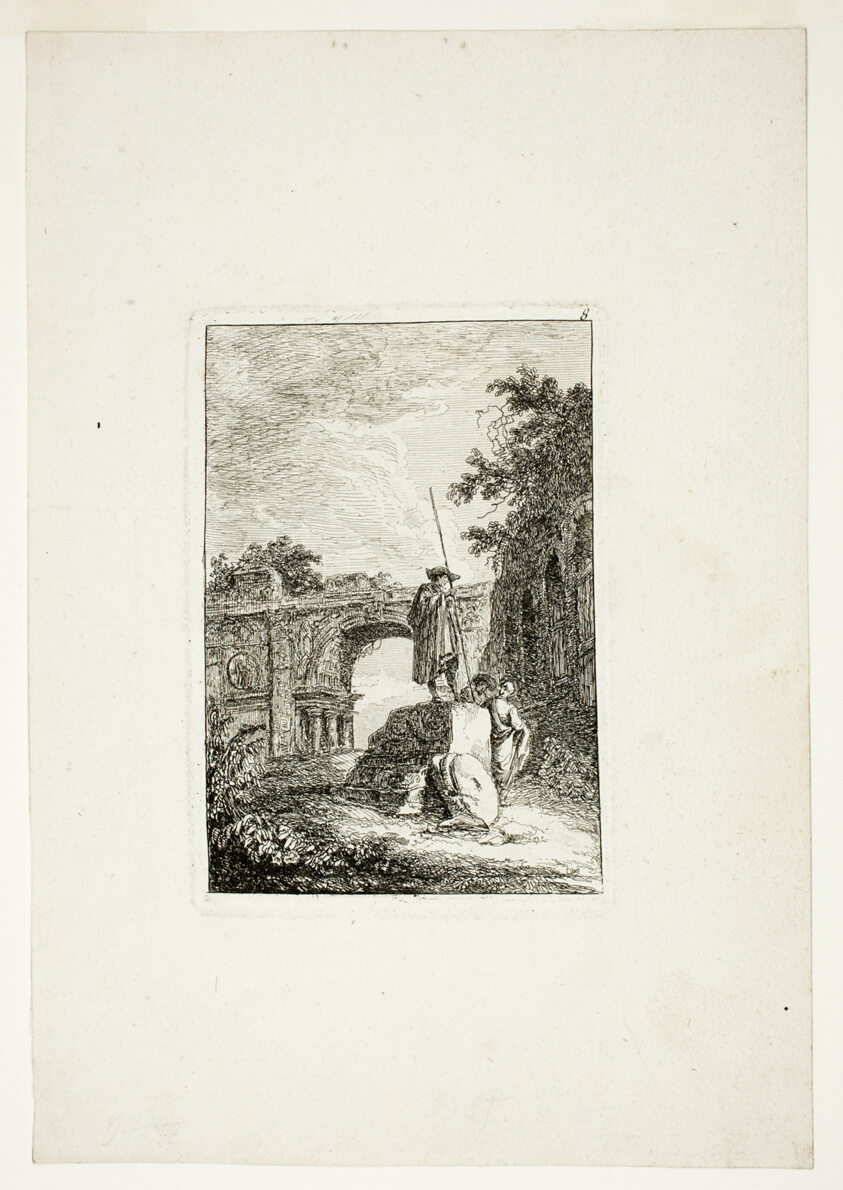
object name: Print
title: The Triumphal Arch, plate eight from Les Soirées de Rome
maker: Hubert Robert (French, 1733-1808)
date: 1763/64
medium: Etching on ivory laid paper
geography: France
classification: etching; print; prints and drawing